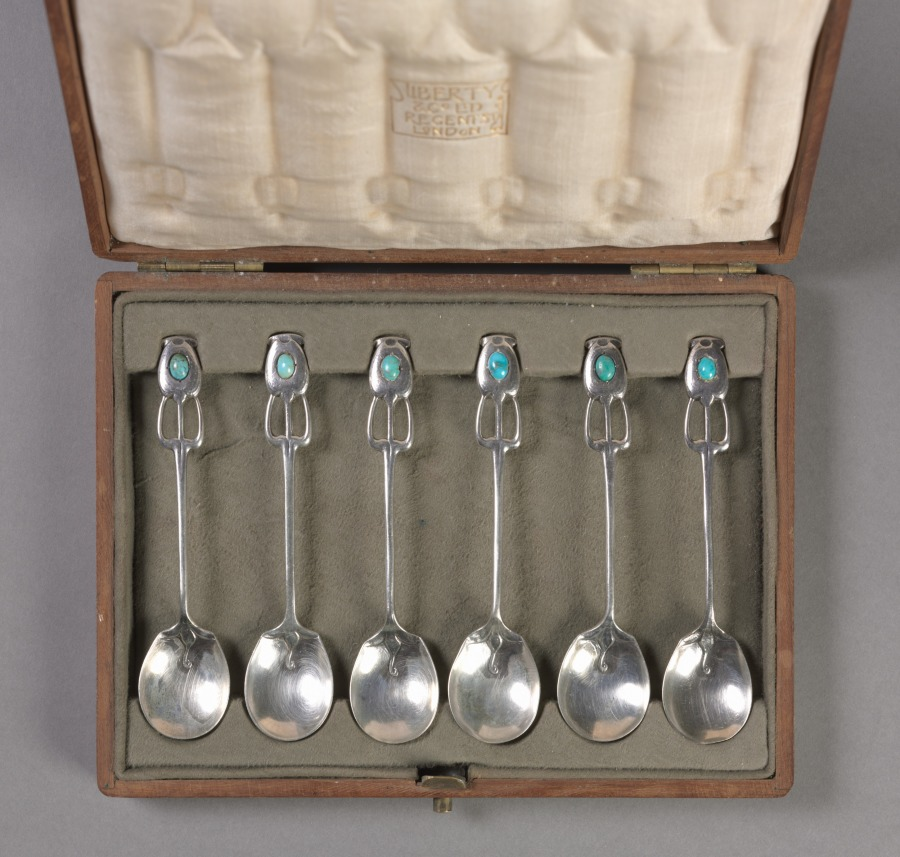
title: Set of six Coffee Spoons in Original Wooden Case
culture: England, London, 19th century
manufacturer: Liberty and Company (British)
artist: attributed to Oliver Baker (British, 1856–1939)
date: 1905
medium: Silver, turquoise, wooden box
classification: Silver